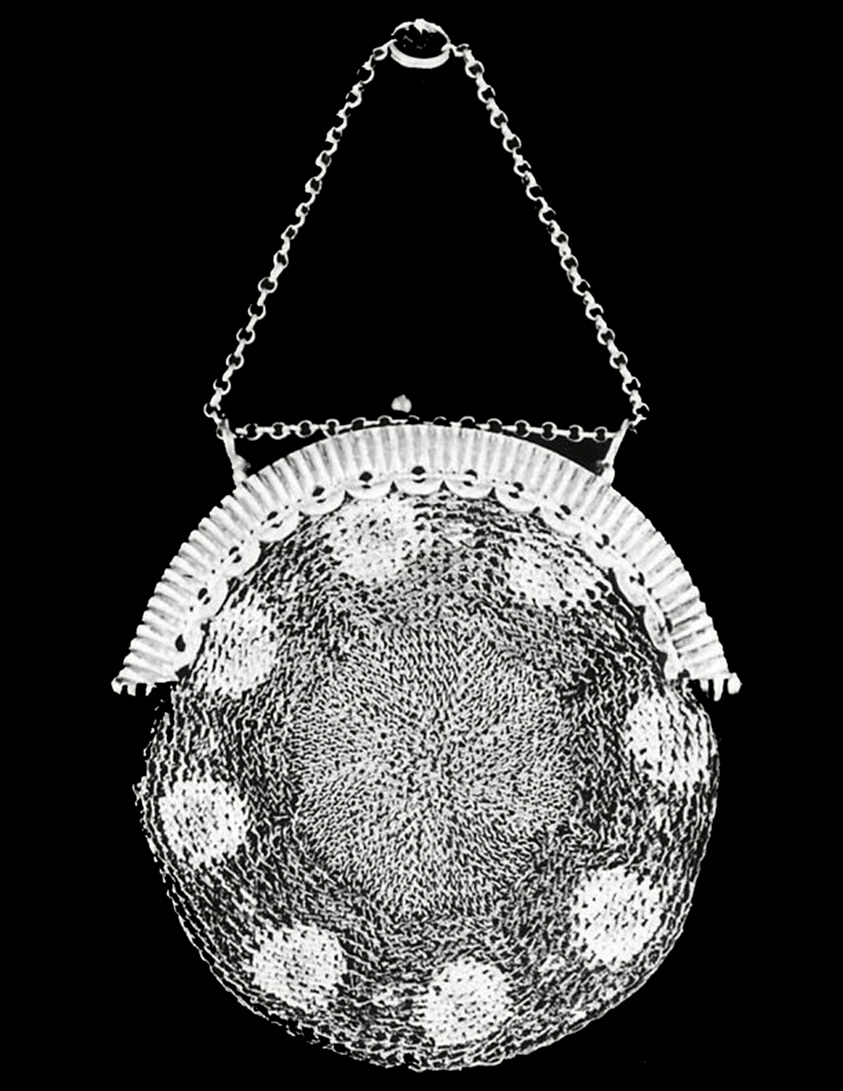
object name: Textile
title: Purse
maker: France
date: 19th century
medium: Knitted in silk and metal thread consisting of strip wound on silk core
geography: France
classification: textile; needlework (visual works)